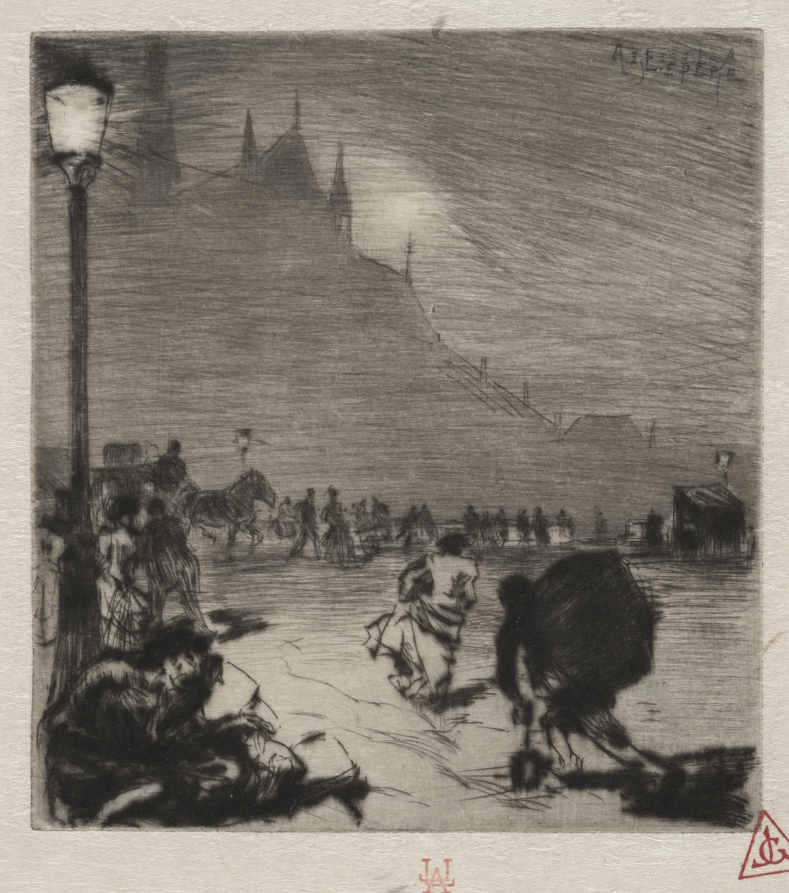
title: Au Coin du Pont-aux-Doubles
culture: France, 19th-20th century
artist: Auguste Louis Lepère (French, 1849–1918)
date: 1893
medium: etching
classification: Print